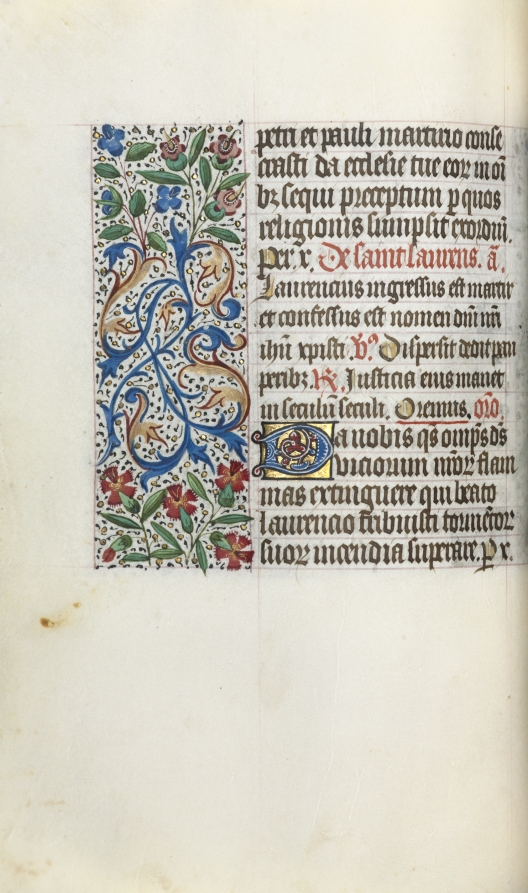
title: Book of Hours (Use of Rouen): fol. 51v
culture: France, Rouen, 15th century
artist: Master of the Geneva Latini (French, active Rouen, 1460–80)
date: c. 1470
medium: ink, tempera, and gold on vellum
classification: Bound Volume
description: In the late 1400s and early 1500s Rouen was an established and important center of book production. The city’s cathedral had a wealthy chapter that spent large sums of money to commission books and to maintain its extensive library. The stationers and booksellers would have likely been concentrated in or near the cathedral precinct. This artist, named after a manuscript now in Geneva, was Rouen’s principal illuminator during the second half of the 1400s.